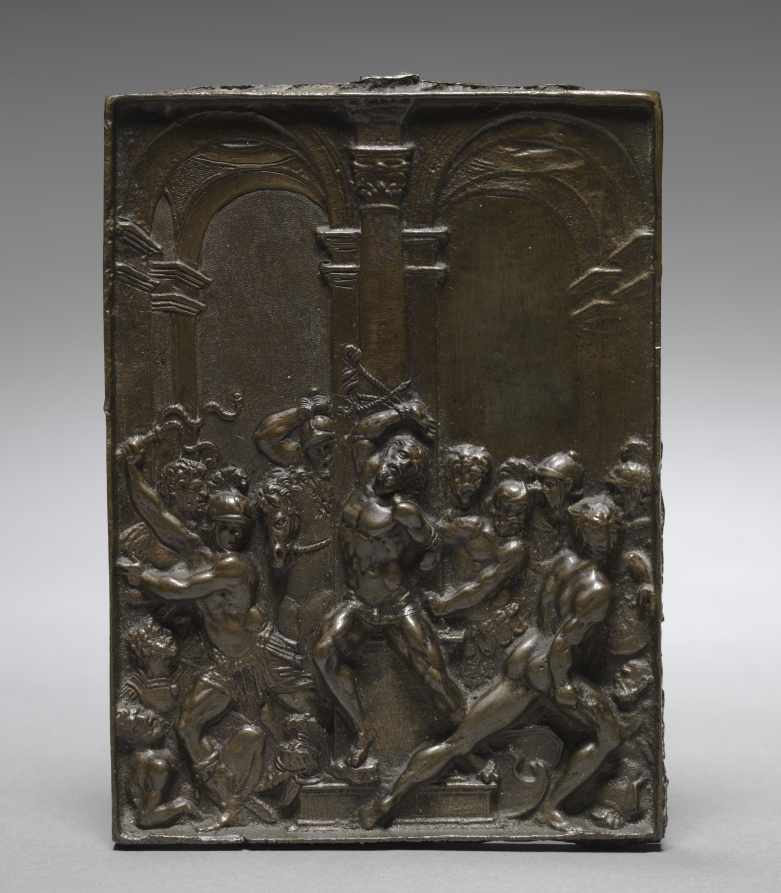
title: The Flagellation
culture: Italy, 16th century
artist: Moderno (Italian, 1467–1528)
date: 16th century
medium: bronze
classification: Sculpture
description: Although not exact copies, the compositions of both this bronze plaque and drawing derive from the Laocoön group, an ancient marble sculpture unearthed in 1506 in Rome. The nearly life-size statue of the Trojan priest Laocoön and his sons battling giant sea snakes quickly became a source of inspiration for artists. They especially appreciated the emotional anguish and physical strain portrayed by the struggling male nudes. In The Flagellation, the sculptor Moderno adopted Laocoön’s pose and muscularity for the suffering figure of Christ, thereby presenting him as an athletic and virtuous hero. Pordenone’s drawing of a man entwined by two serpents seems to be his own expressive version of Laocoön.